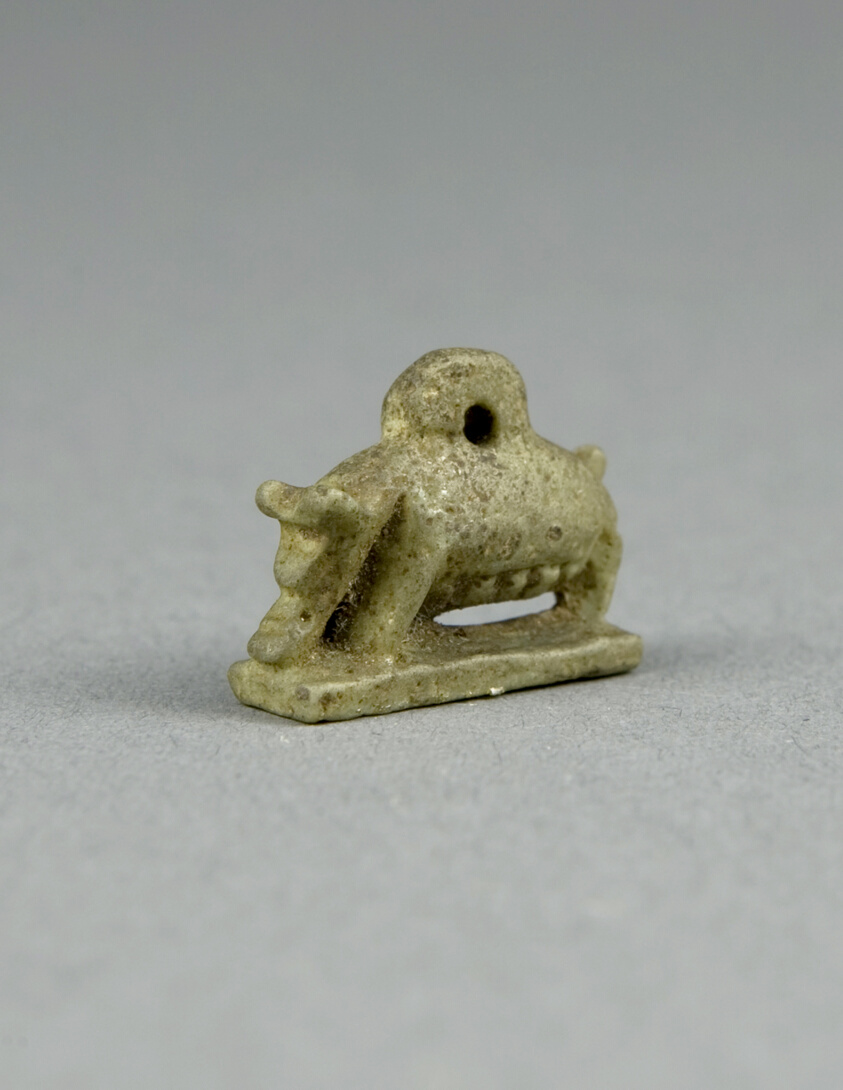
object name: Costume and Accessories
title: Amulet of a Sow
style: third intermediate period, egyptian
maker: Egyptian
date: Third Intermediate Period, Dynasty 21–25 (1070–656 BCE)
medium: Ceramic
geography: Egypt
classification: amulet; jewelry; ceramics; ancient art; costume